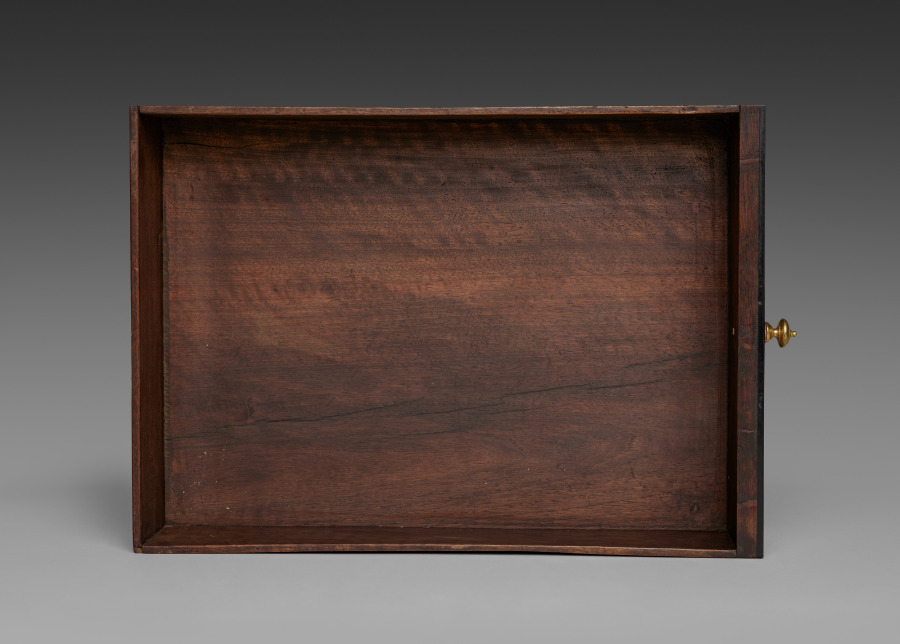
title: Interior Drawer for Cabinet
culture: France, late 17th Century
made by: André-Charles Boulle (French, 1642–1732)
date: c. 1690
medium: ebony, marquetry in metal and tortoise shell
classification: Furniture and woodwork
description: Appointed cabinetmaker to King Louis XIV in 1672, André-Charles Boulle became a master of furniture making in France during the late 1600s until his death in 1732. Known primarily for his use of marquetry, in which metal patterns are inlaid into tortoiseshell then applied within the veneered surface of the furniture, Boulle established a level of quality and craftsmanship few others could achieve. As a result, his work found favor at the royal court and among other aristocrats and diplomats eager to impress the king. The inclusion of a medallion depicting Louis XIV within the bronze decoration of this chest would have identified the owner with the royal court. Often exhibiting stout architectural proportions with elegant groups of inlaid motifs such as the parrot on the central panel of this chest, Boulle’s designs are an example of the intellectual fashion for contrasting ideas, materials, and motifs.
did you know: Originally designed to sit atop an elaborate tall stand, this chest was likely altered in the late 1700s to reduce its scale and height.